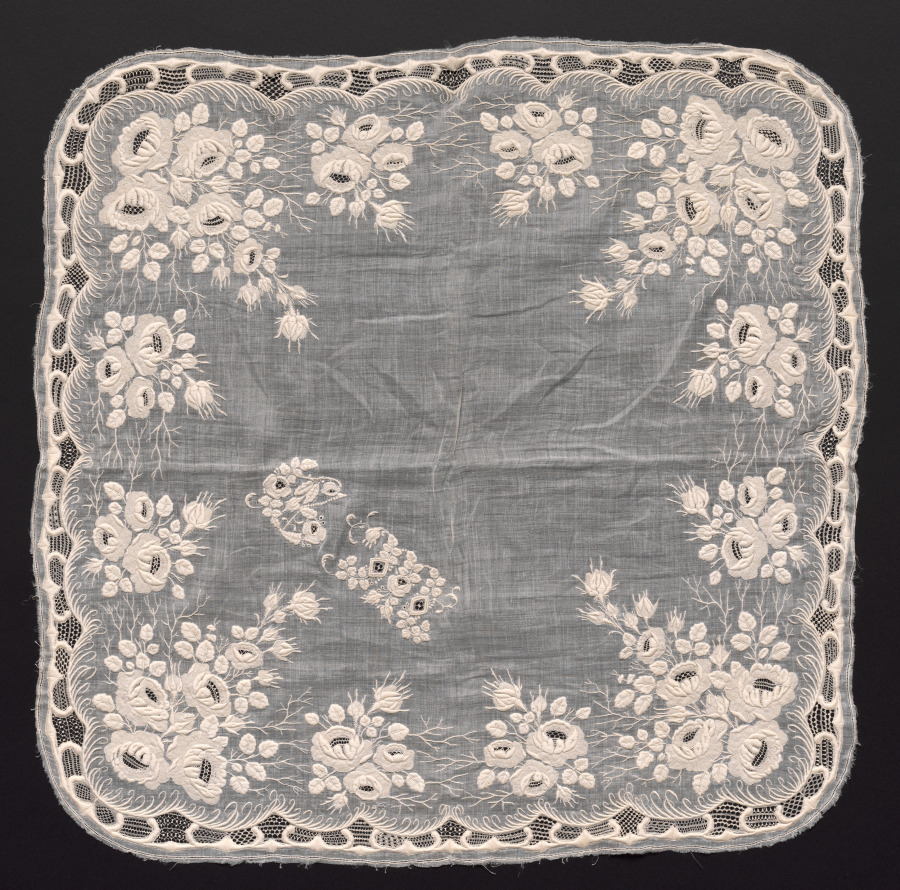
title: Lace Handkerchief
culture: France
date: 1800s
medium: Linen: needle lace (drawnwork) and embroidery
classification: Embroidery